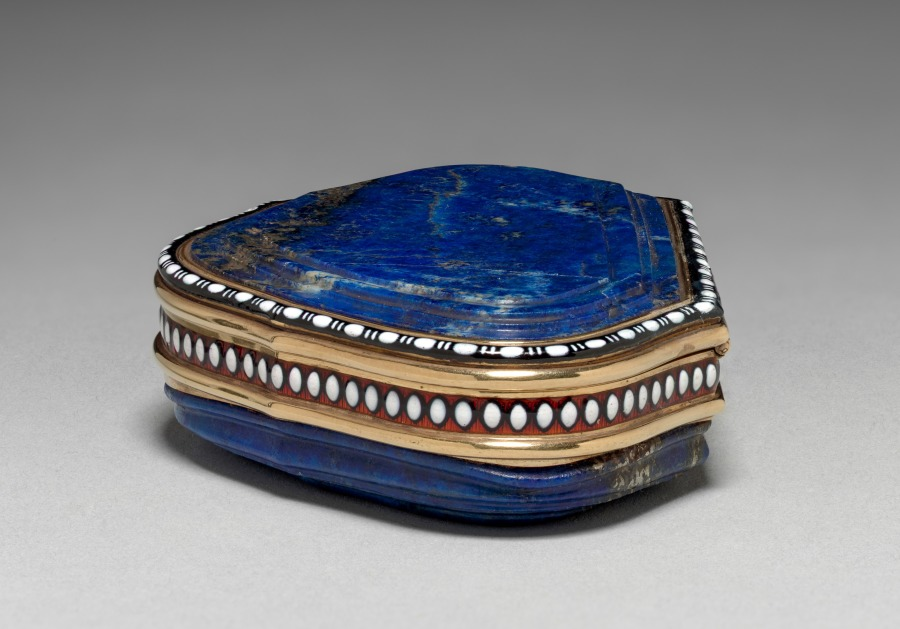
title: Snuff Box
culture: Germany, Dresden (?), mid-18th century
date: mid-1700s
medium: lapis lazuli with enameled gold mounts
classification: Miscellaneous